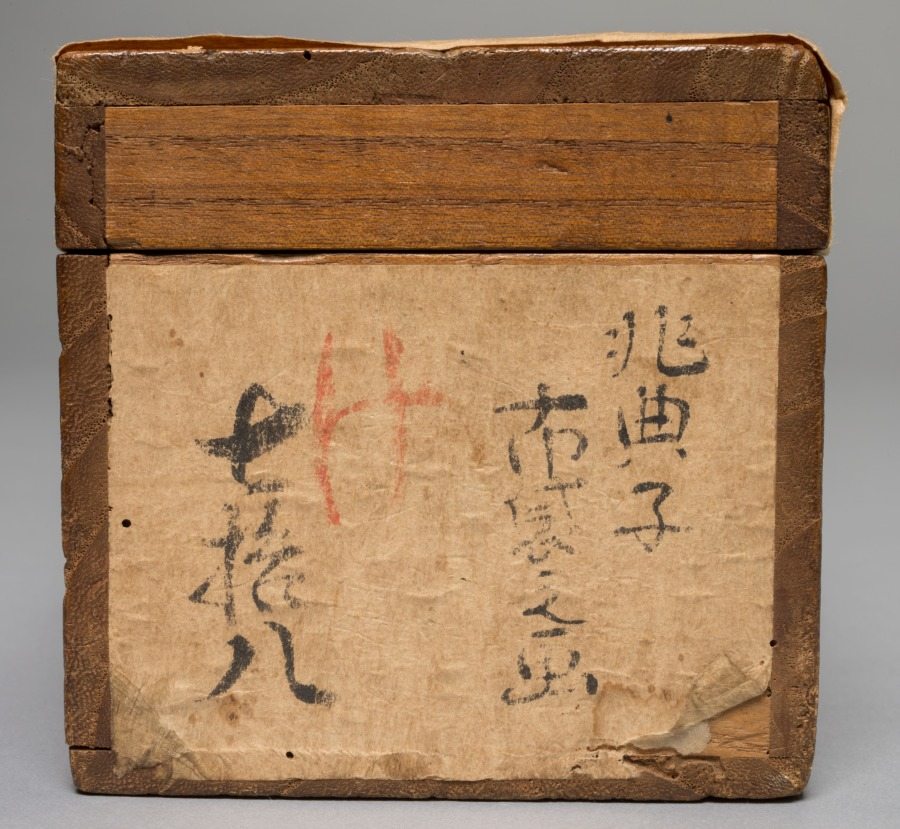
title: Hotei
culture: Japan, Muromachi period (1392–1573)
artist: Kichizan Minchō (Japanese, 1352–1431)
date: late 1300s–early 1400s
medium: hanging scroll; ink and slight color on paper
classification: Painting